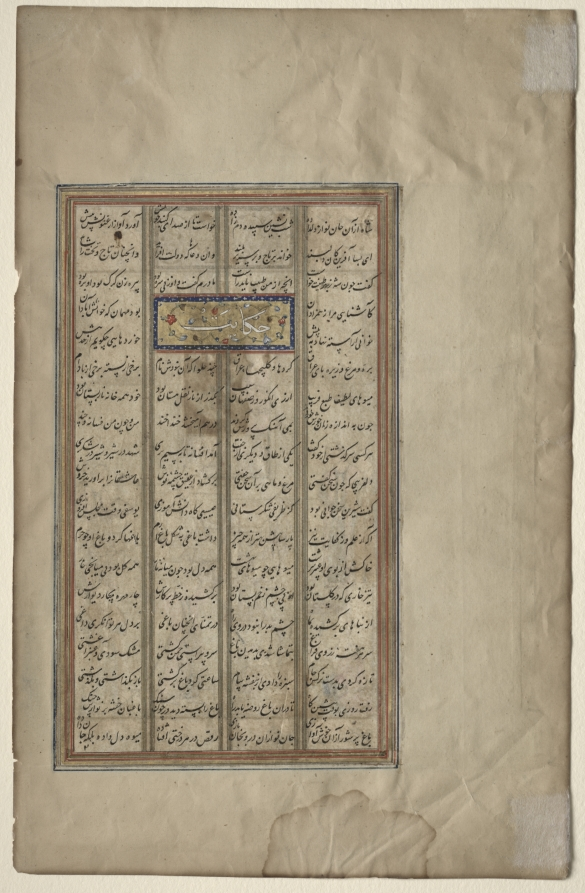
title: Text in Khamsa of Nizami (verso), from a Haft Paykar (Seven Portraits) of Nizami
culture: Iran, Shiraz, Safavid period (1501-1722)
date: c. 1560–80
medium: opaque watercolor, ink, and gold on paper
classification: Manuscript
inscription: Script: Nasta'liq